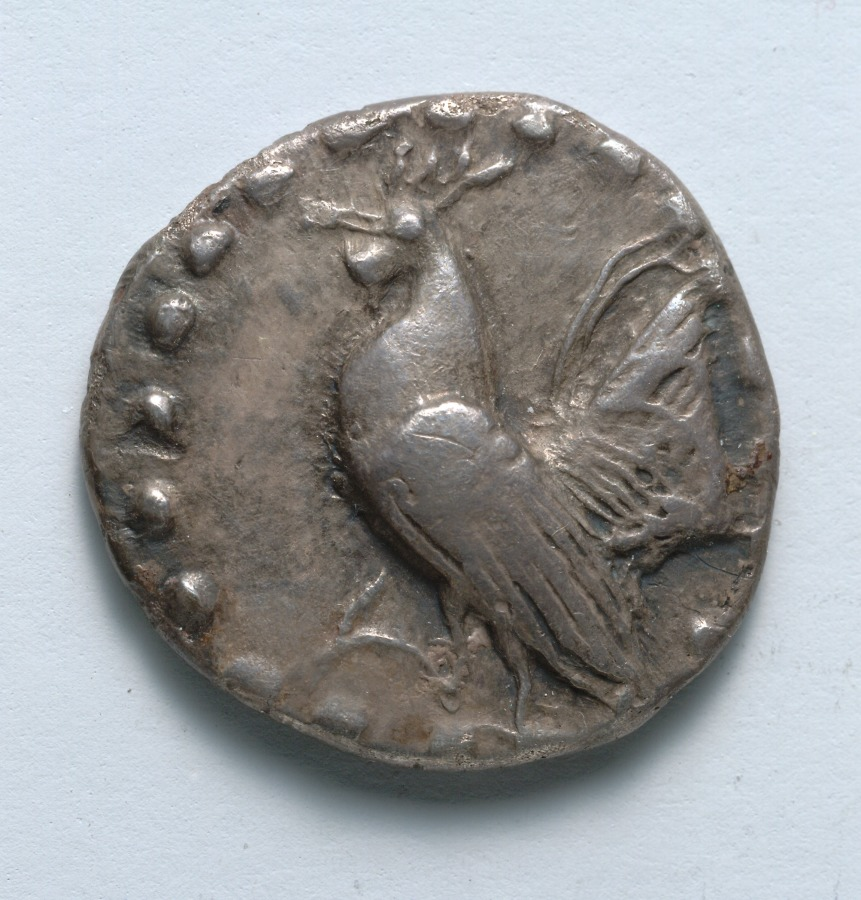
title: Drachm: Rooster (obverse); Incuse Square (reverse)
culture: Greek, minted at Himera (Sicily)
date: c. 530–483 BCE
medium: silver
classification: Coins